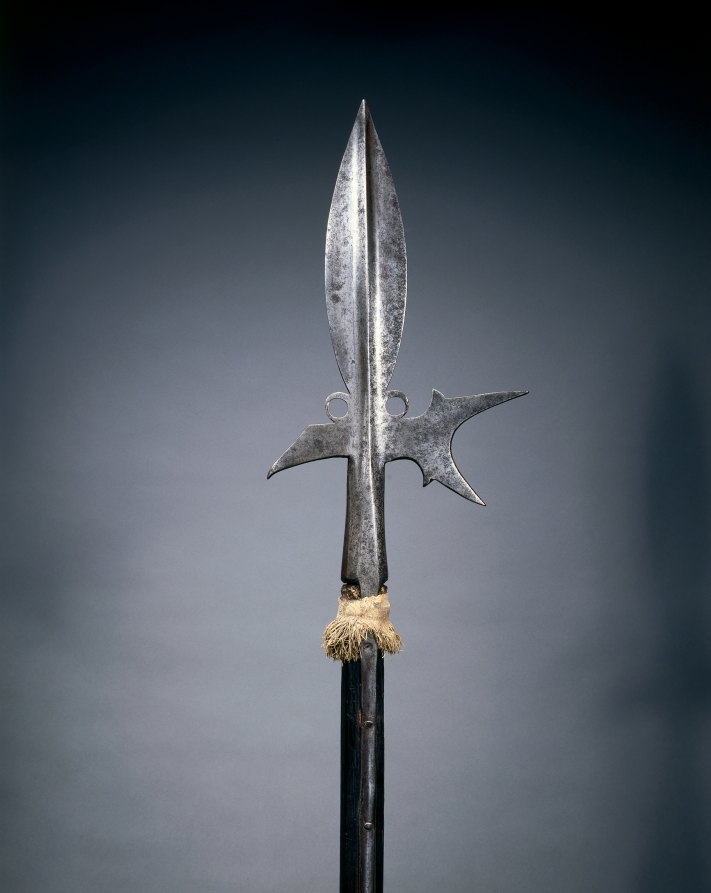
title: Halberd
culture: Germany, late 16th Century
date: c. 1580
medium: steel; leaf-shaped head; octagonal woof haft, woolen pompom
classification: Arms and Armor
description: The halberd was a staff weapon favored by European infantries (foot soldiers) of the 1400s and 1500s for its versatility and deadly effect. The word halberd comes from the German words Halm (staff) and Barte (axe). The halberd is, in fact, an axe that served multiple functions: the axe blade was used for hacking, the spike for thrusting, and the beak for piercing plate armor or for pulling a knight from his saddle. The halberd was used by shock troops (those who lead an attack) and by Swiss and German mercenaries. After about 1550, the halberd gradually became less functional. Its large blade provided space for coats of arms and insignia. By the late 1500s, the parade halberd had become a ceremonial weapon for palace guards.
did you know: The production of a halberd was surprisingly complicated. The blade must cut but the rest of the metal head had to flexibly absorb and distribute force without breaking.